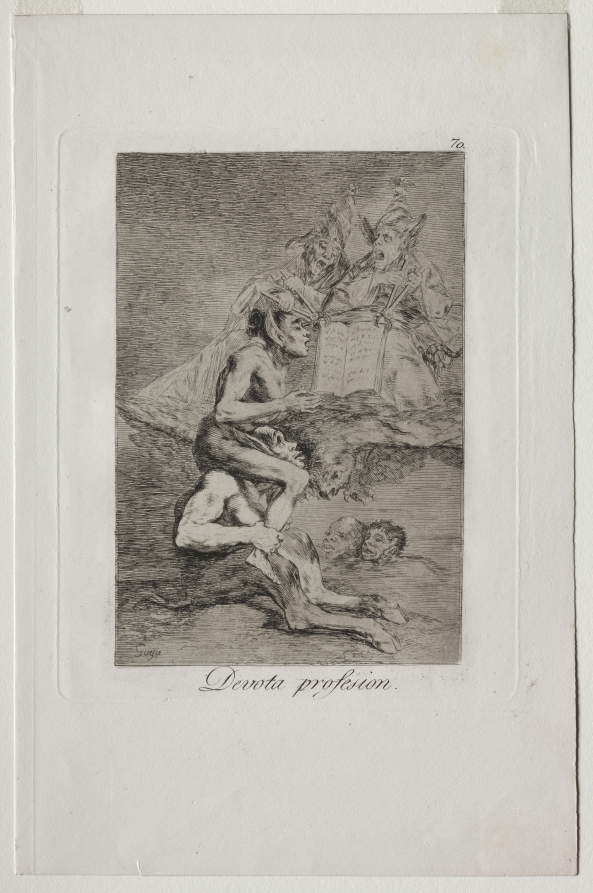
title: Devout Profession, Plate 70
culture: Spain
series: Los Caprichos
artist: Francisco de Goya (Spanish, 1746–1828)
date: 1799 (printed c. 1855)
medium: etching and aquatint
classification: Print